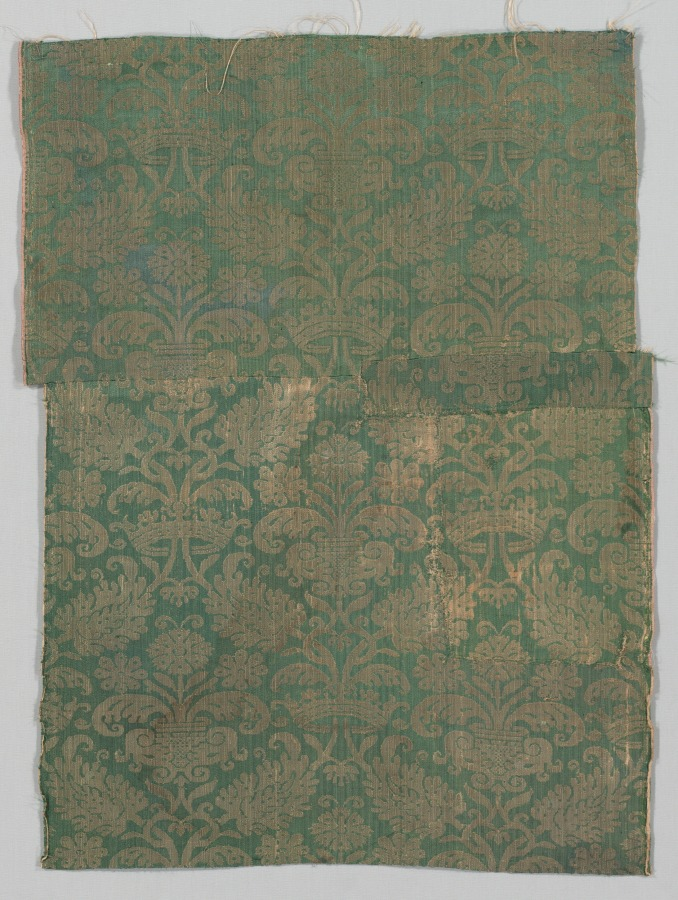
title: Two Lengths of Textile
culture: Italy or Spain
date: 1500s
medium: damask, silk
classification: Textile